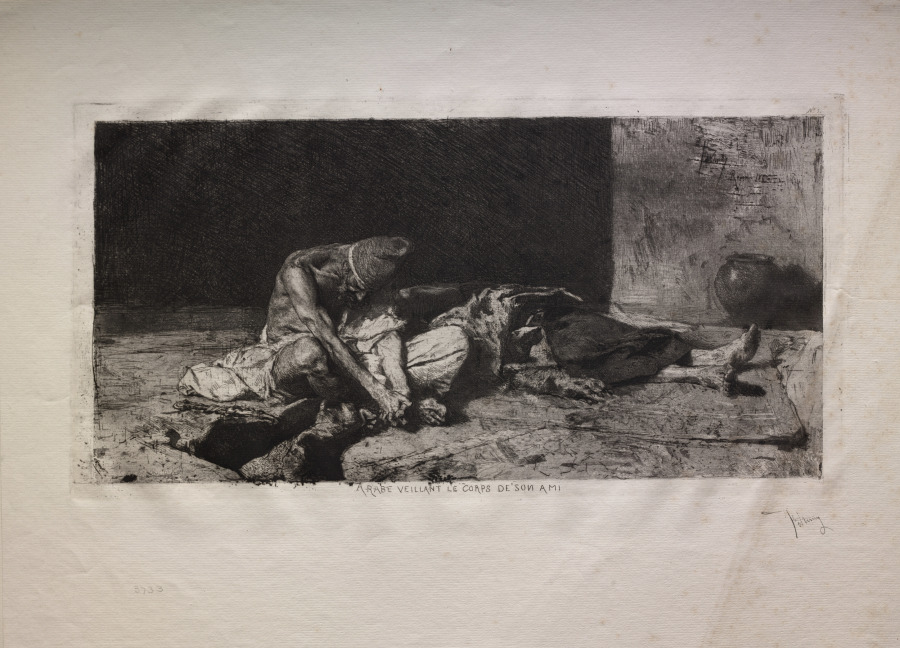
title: Arab Watching over the Body of His Friend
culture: Spain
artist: Mariano Fortuny (Spanish, 1838–1874)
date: 1866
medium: etching and aquatint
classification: Print